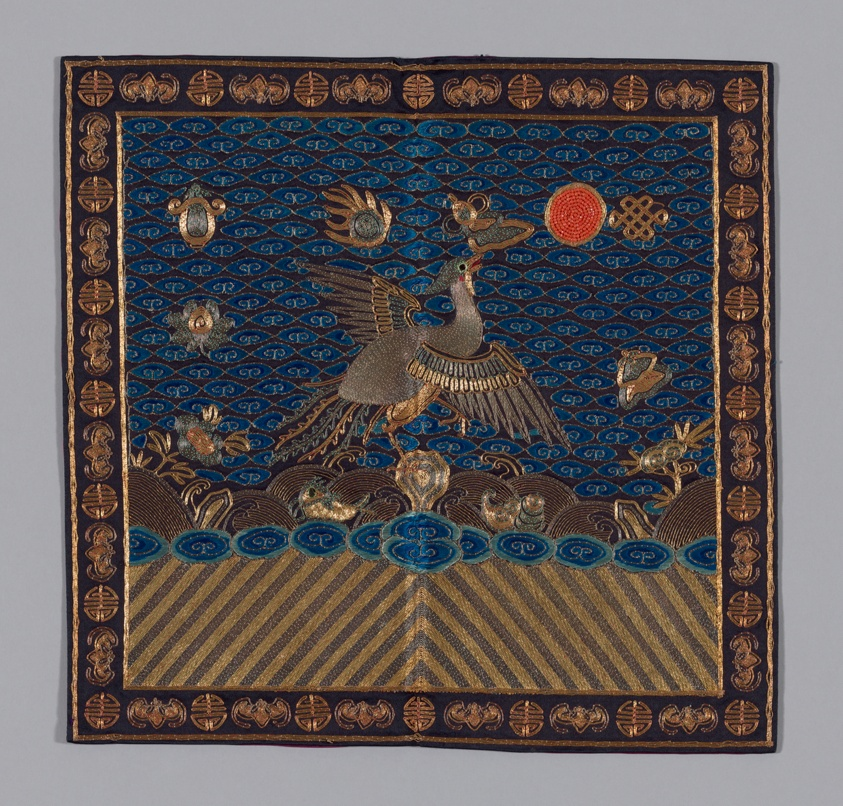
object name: Costume and Accessories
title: Man's Court Badge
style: qing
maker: Manchu (China)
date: 1880/1900, Qing dynasty (1644–1911)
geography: China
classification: textile; weaving; needlework (visual works); costume